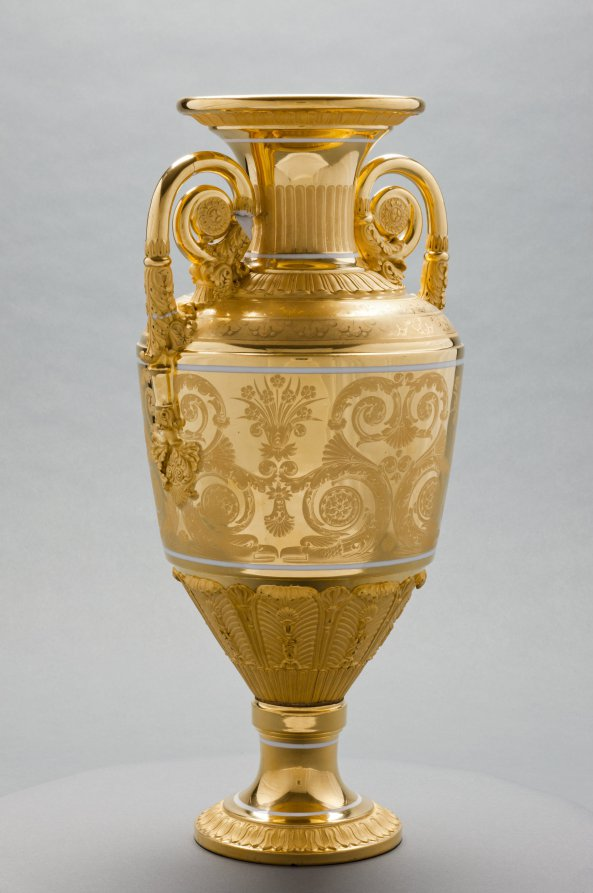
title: Vase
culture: Russia, St. Petersburg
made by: St. Petersburg Imperial Porcelain Factory (Russian)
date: c. 1820–1830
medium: gilt porcelain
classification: Ceramic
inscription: inscribed: "Moreau" in gold near lip.